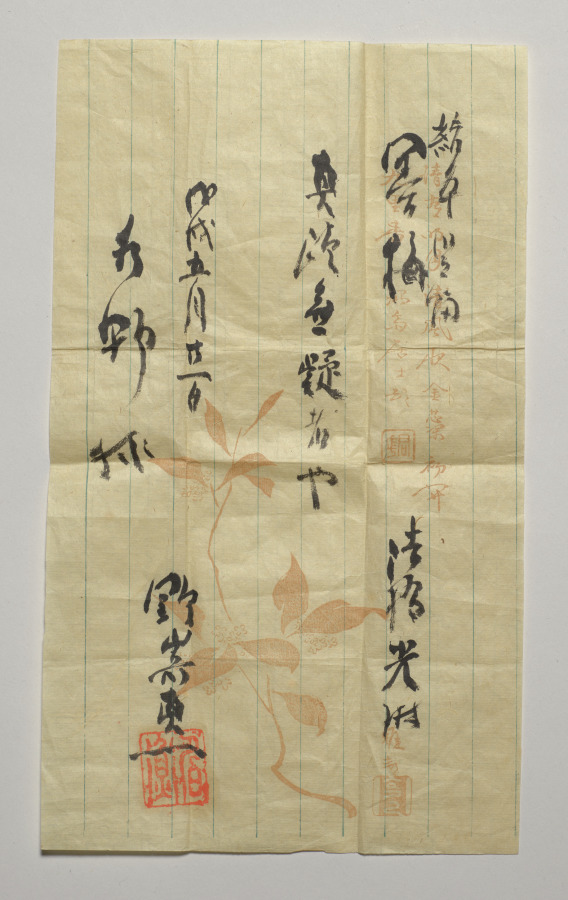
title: Plum Tree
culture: Japan, Edo period (1615–1868)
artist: Ogata Kōrin (Japanese, 1658–1716)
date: c. 1700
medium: hanging scroll; ink on silk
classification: Painting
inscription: Artist's signature and seal above hillock bottom right corner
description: Ogata Kōrin had to think through his design carefully to create these white plum blossoms and deliver their effect, as he used the reserve technique—where selected areas of the painting surface are left unpainted—to achieve it. He probably roughed in the tree before applying an ink wash to the entire silk surface, except where he intended to place the flowers. He likely then returned to articulate the petals and, in some cases, the pistils and stamens. The composition shows the tree twisting out of view, only to return with a branch of new growth jabbing forth from an old, broken limb, thereby heightening the visual impact of the blossoms.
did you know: The Rinpa style of painting is named for Ogata Kōrin, even though he did not create it.